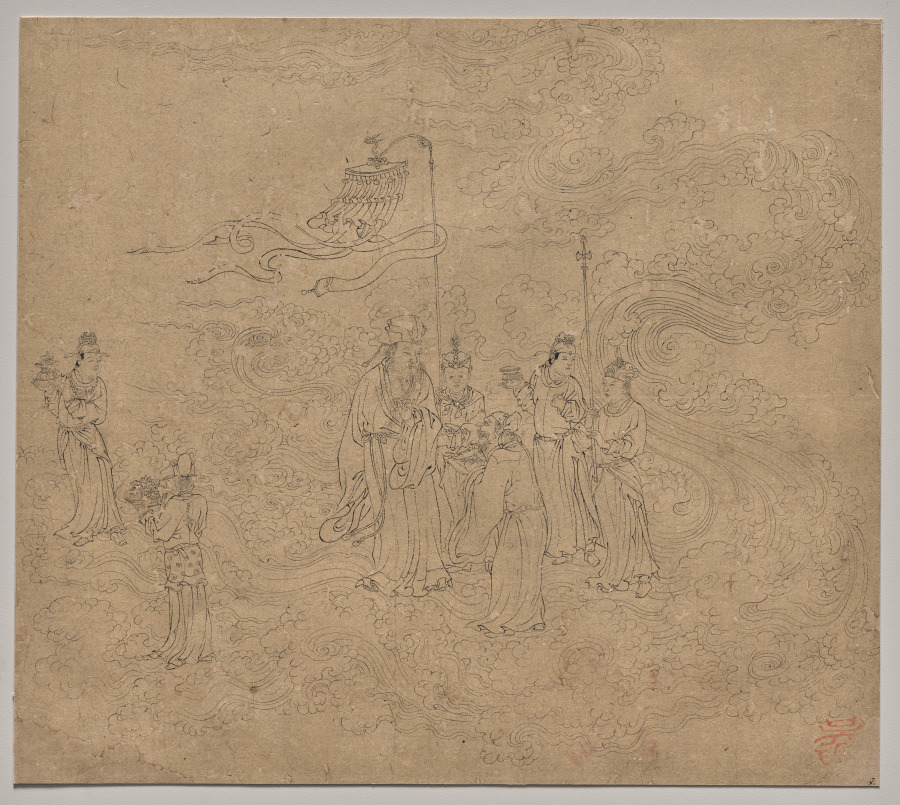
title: Album of Daoist and Buddhist Themes: Procession of Daoist Deities: Leaf 7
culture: China, Southern Song dynasty (1127-1279)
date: 1200s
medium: Album, ink on paper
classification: Painting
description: This extraordinary album has 50 paintings on a variety of religious subjects. They were likely created by several master craftsmen to share with studio apprentices as models for fulfilling commissions. The Jade Emperor and the Daoist pantheon make up the first 26 leaves. The next 14 leaves portray the Buddhist Ten Kings of Hell administering punishments to the dead. The third section, called “Clearing the Mountains,” features divine soldiers, led presumably by the deity Erlang Shen 二郎神, fighting undesirable creatures.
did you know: Six attendants escort a divine lord, likely one of the Five Emperors.